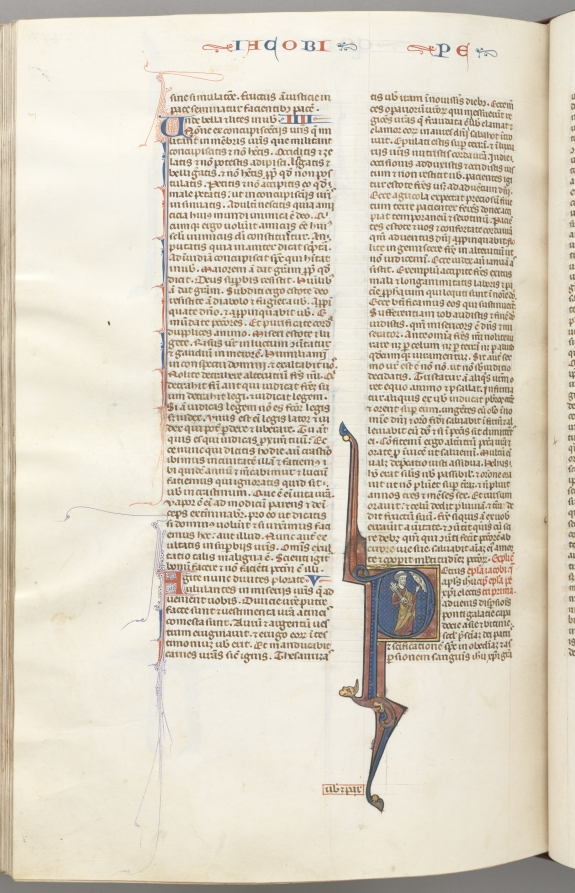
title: Fol. 477v, Peter, historiated initial P, Peter with a key, talking to the bust of God above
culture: Southern France, Toulouse(?), 13th century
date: c. 1275–1300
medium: ink, tempera and gold on vellum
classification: Bound Volume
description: Biblical manuscripts were highly prized and important possessions of churches, monasteries, cathedral schools, and universities throughout medieval Europe. The biblical texts were known as the vulgate, the translations made by Saint Jerome in the fourth century from Hebrew and Greek into Latin, which became the definitive and official Latin version of the Roman Church. In the 13th century, the bible was, for the first time, produced as a single volume with an officially sanctioned sequence to its books and chapters as illustrated by this example. The very extensive decoration of this bible is arranged hierarchically to indicate the relative importance of the various texts so that full or almost full-page initials mark the openings of the first prologue, Genesis, and the first Gospel; historiated initials mark the beginning of each book and illuminated initials mark the Prologues.